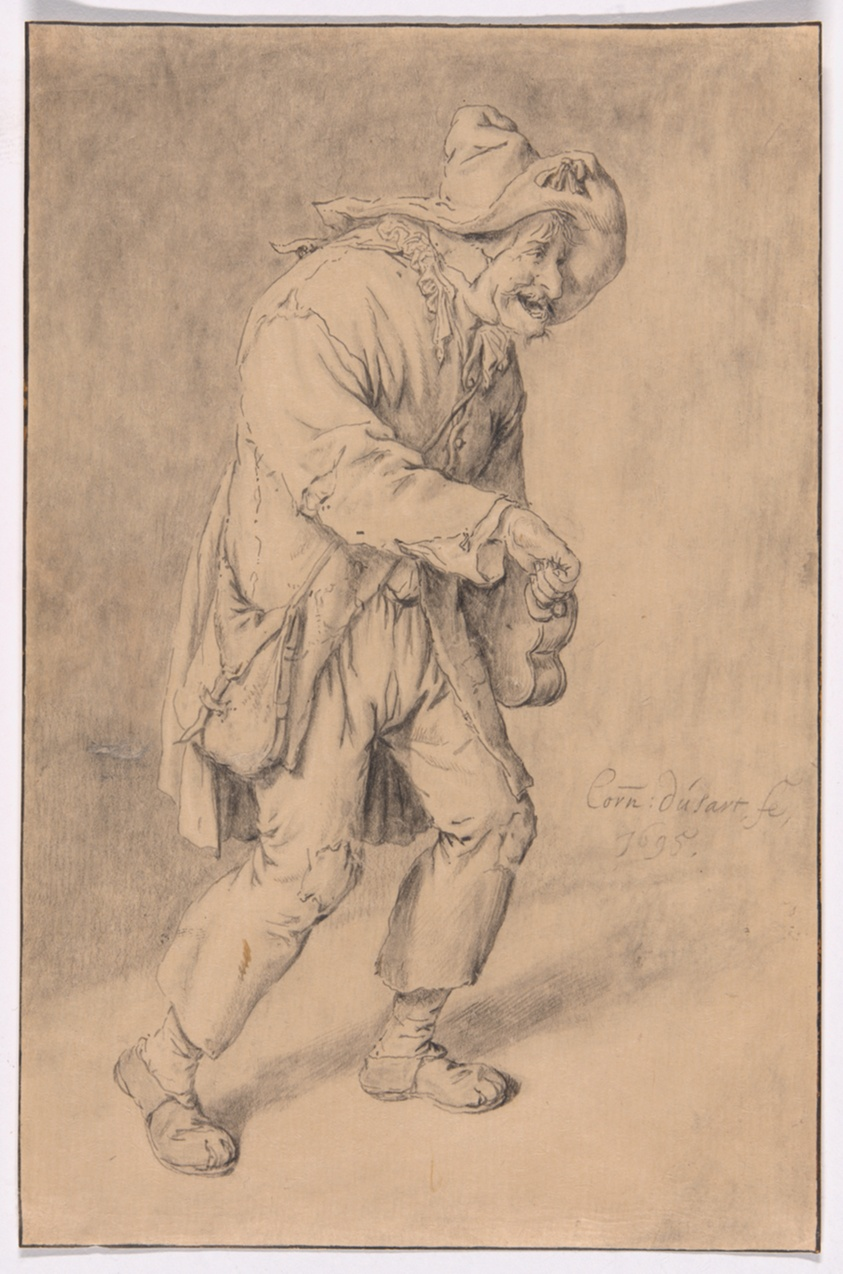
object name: Drawing and Watercolor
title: Hurdy-Gurdy Player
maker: Cornelis Dusart (Dutch, 1660-1704)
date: 1695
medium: Pen and black ink, with black chalk and touches of black crayon, on cream Japanese paper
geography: Holland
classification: graphite; drawings (visual works); prints and drawing